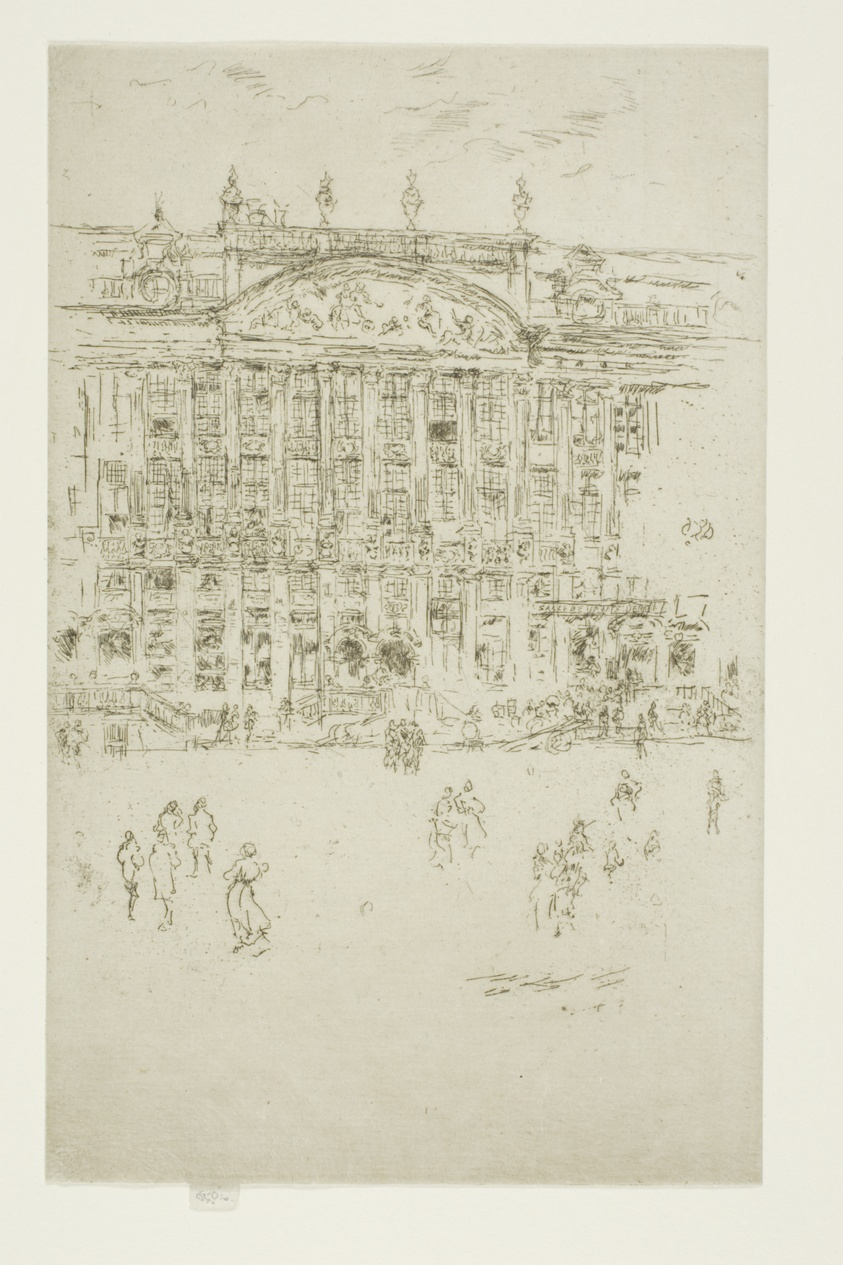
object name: Print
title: Grand' Place, Brussels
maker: James McNeill Whistler (American, 1834-1903)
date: 1887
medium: Etching and drypoint with foul biting in black ink on ivory laid paper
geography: United States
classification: etching; drypoint; print; prints and drawing; foul biting; paper